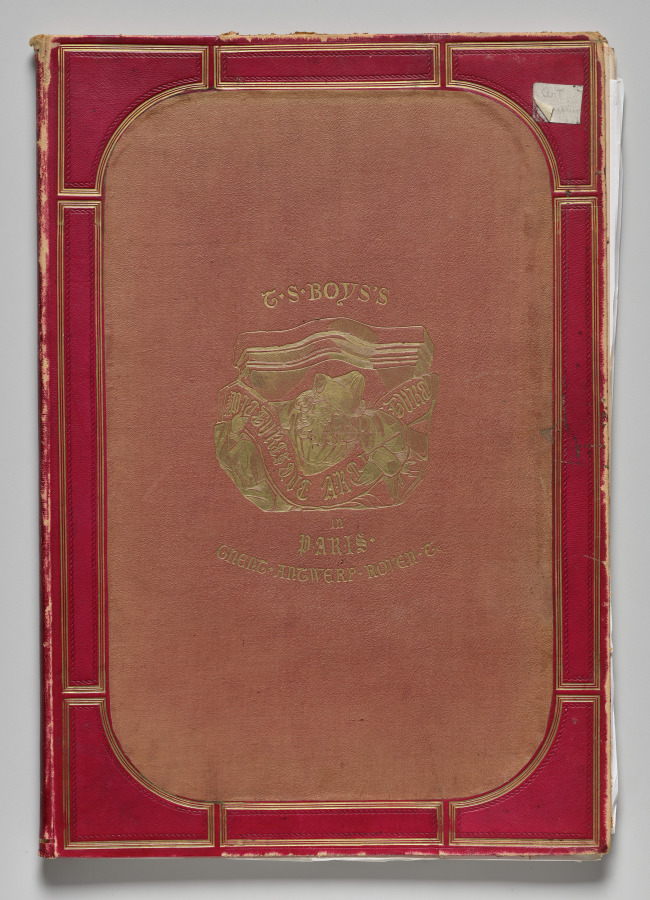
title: Picturesque Architecture in Paris, Ghent, Antwerp, Rouen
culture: England, 19th century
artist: Thomas Shotter Boys (British, 1803–1874)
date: 1839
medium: lithograph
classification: Portfolio